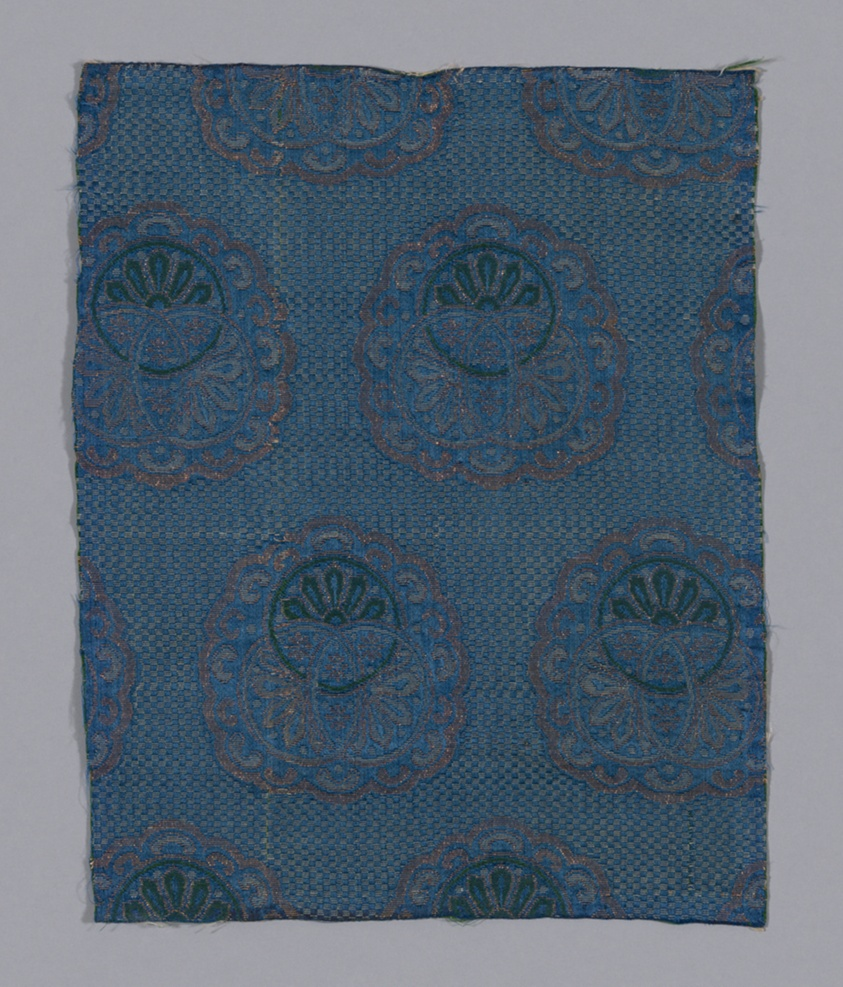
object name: Textile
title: Fragment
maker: Japan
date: Edo period (1615–1868), 1775/1800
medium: Fancy compound twill, silk and gilt paper; 3 strips to m.m.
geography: Japan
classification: textile; weaving